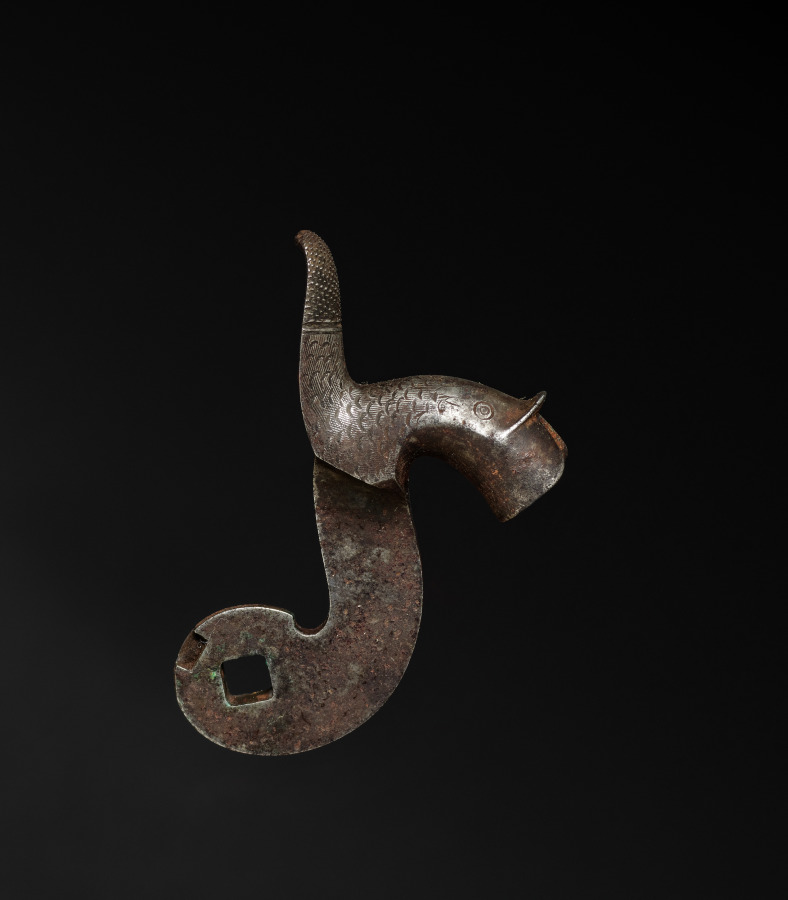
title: Gun-Lock Hammer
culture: England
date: c. 1800–1825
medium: steel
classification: Arms and Armor